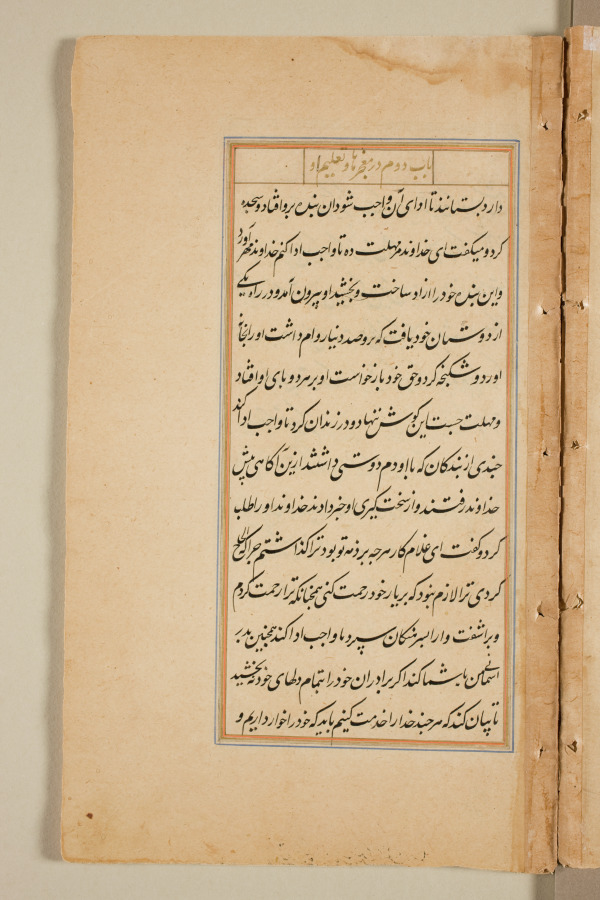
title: Text page from a Mirror of Holiness (Mir’at al-quds) of Father Jerome Xavier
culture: Mughal India, Allahabad, made for Prince Salim (1569–1627)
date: 1602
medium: Ink and gold on paper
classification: Manuscript